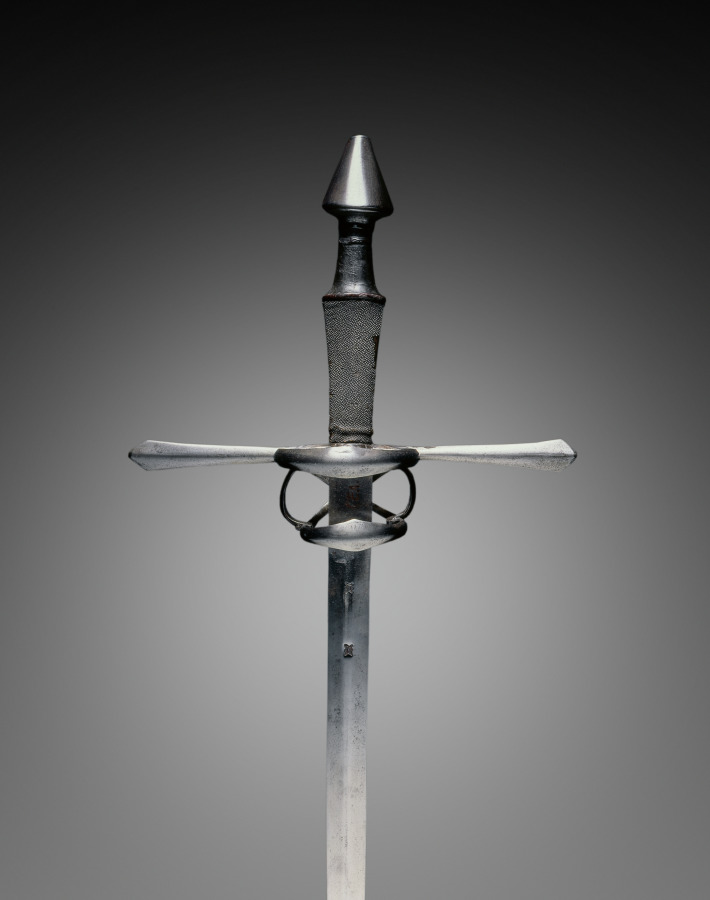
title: Hand-and-a-Half Sword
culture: Germany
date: c.1540–80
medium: steel; wood, leather, sharkskin grip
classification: Arms and Armor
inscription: on blade: CEA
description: A hand-and-a-half sword is a large sword with a double-edged blade and a long grip that, when necessary, could accommodate both hands to wield it. The grip of this sword is made of sharkskin and has been fitted around a wooden core. On the blade are two yet to be identified marks.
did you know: If you are looking for this in the armor court, look up; this sword is part of one of the panoply or decorative arrangements on the wall.